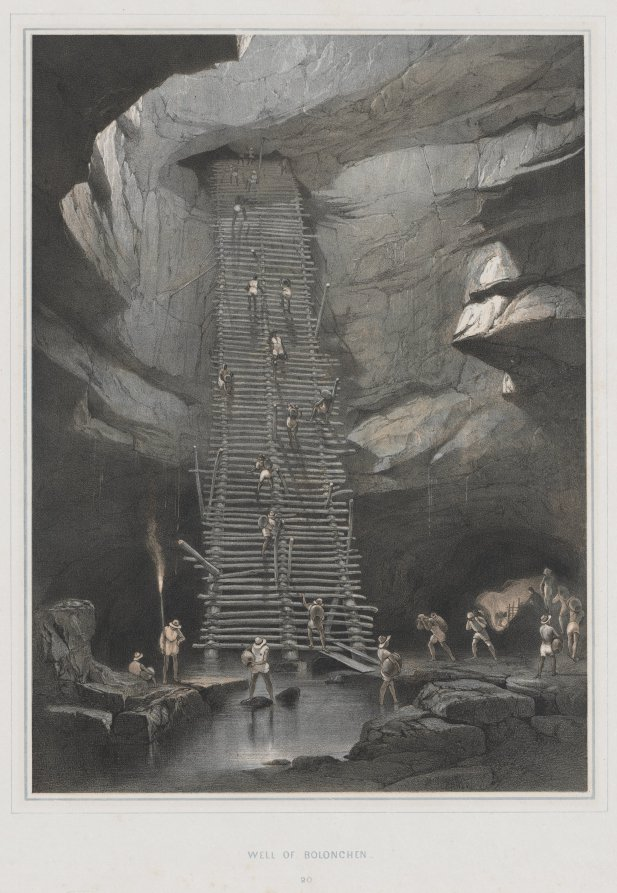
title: Views of Ancient Monuments in Central America, Chiapas and Yucatan, Pl. 20: Well of Bolonchen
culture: England, 19th century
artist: Frederick Catherwood (British, 1799–1854)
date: 1844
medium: color lithograph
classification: Print